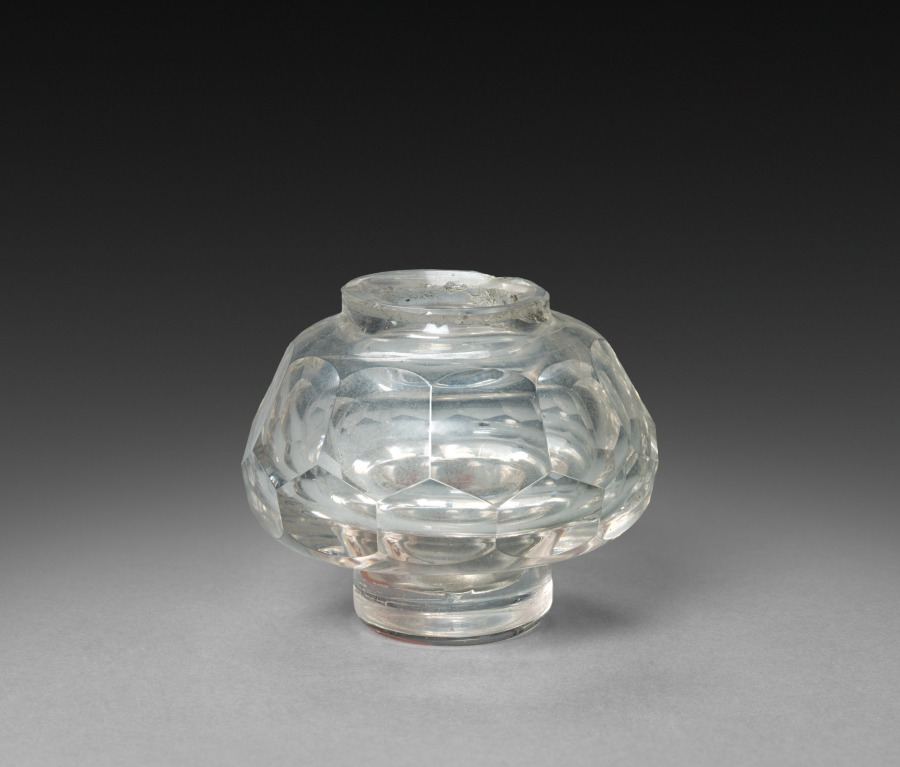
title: Inkwell (bottle)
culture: England or America, 19th century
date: 1825–1850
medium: gilt bronze and glass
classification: Metalwork